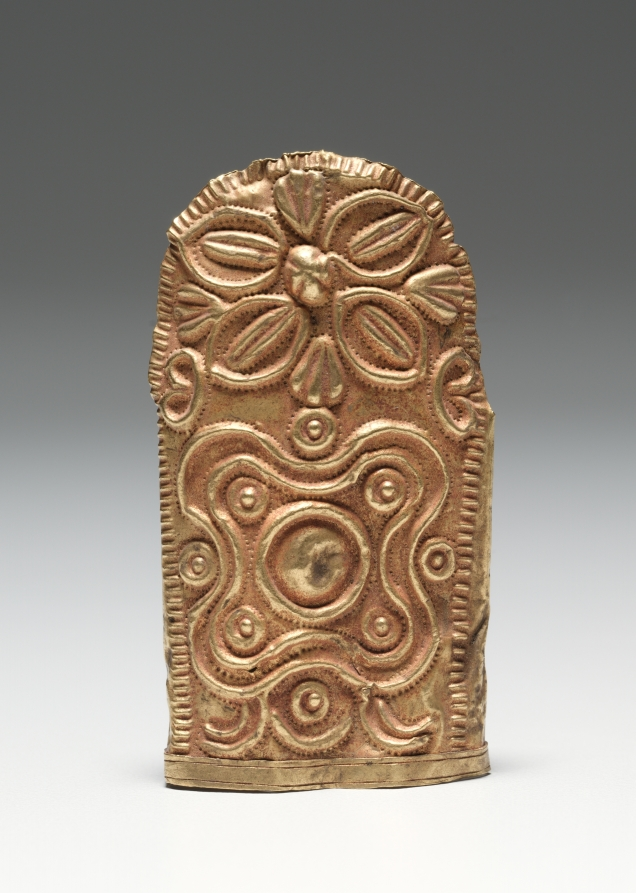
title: Knife-sheath tip (sika boha)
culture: Africa, West Africa, Ghana, Asante Empire/Kingdom, Kumasi or probably Kumasi, member of the goldsmiths' guild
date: 1800s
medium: Gold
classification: Arms and Armor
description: Gold sheaths covered the cast iron blade of a king’s ceremonial knife (sikay), wrapping them with symbolism. In Akan states like the Asante Kingdom, gold embodies lifeforce (kra) and is the sun’s earthly counterpart. Only goldsmiths’ guild members could make gold ornaments for the royals and their entourage, or for the royal treasury. Here, the goldsmith used a tool to push the raised floral, leaf, and geometric designs from the back of soft sheet of gold (repoussé technique). Small dots outlining some motifs were punched into the metal. Similarly decorated gold sheets and solid ornaments capped a knife’s handle.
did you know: Gold objects like this were frequently melted down to make new objects in new fashions.